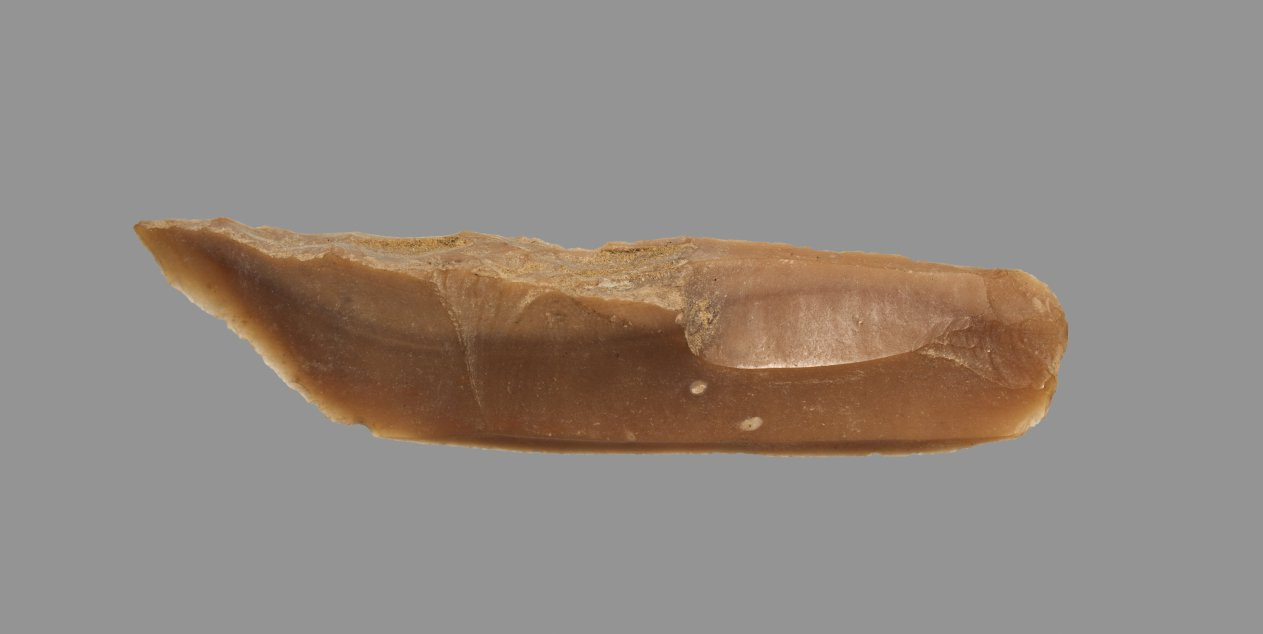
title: Sickle Blade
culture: Egypt, Middle Kingdom (2040–1648 BCE), Dynasty 12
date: 1980–1801 BCE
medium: flint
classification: Implements